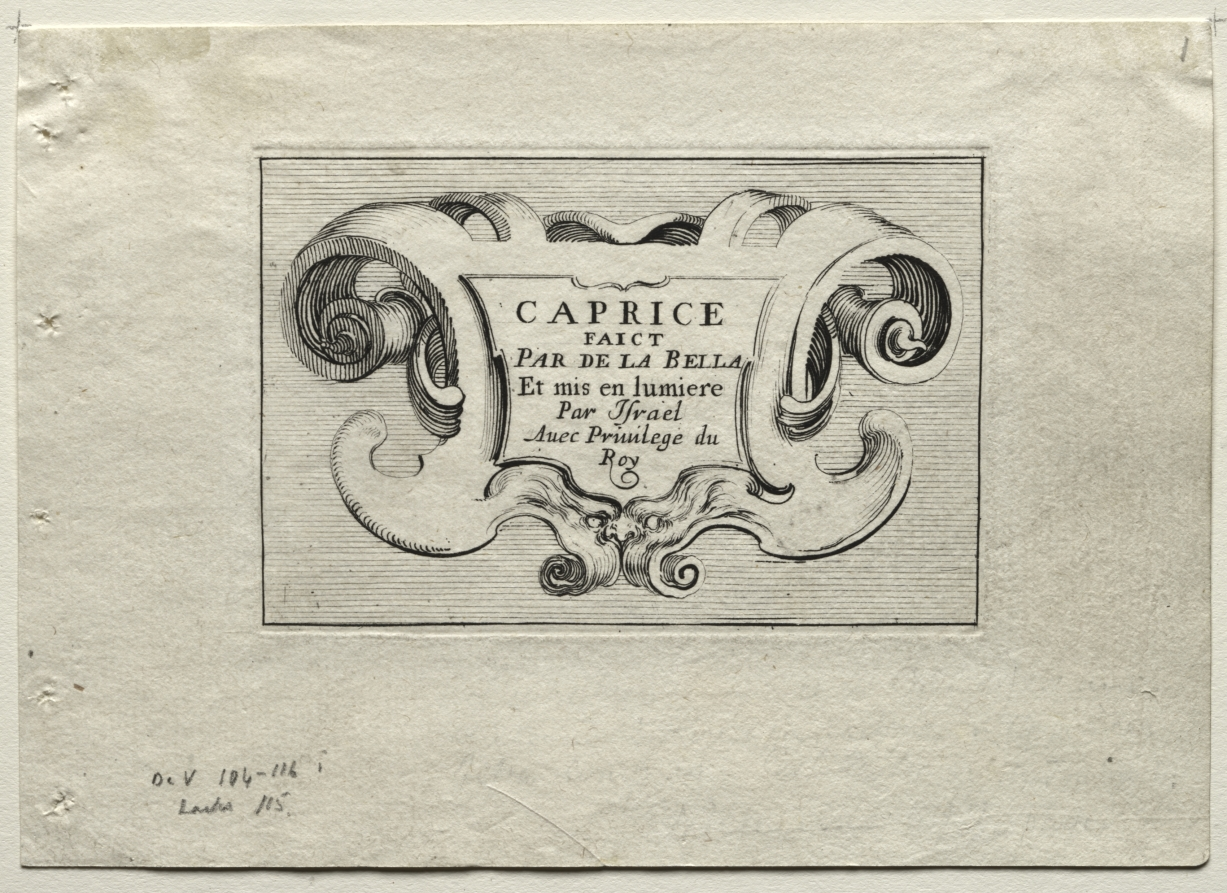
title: Caprices: Title Page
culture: Italy, 17th century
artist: Stefano Della Bella (Italian, 1610–1664)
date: c. 1642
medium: etching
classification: Print